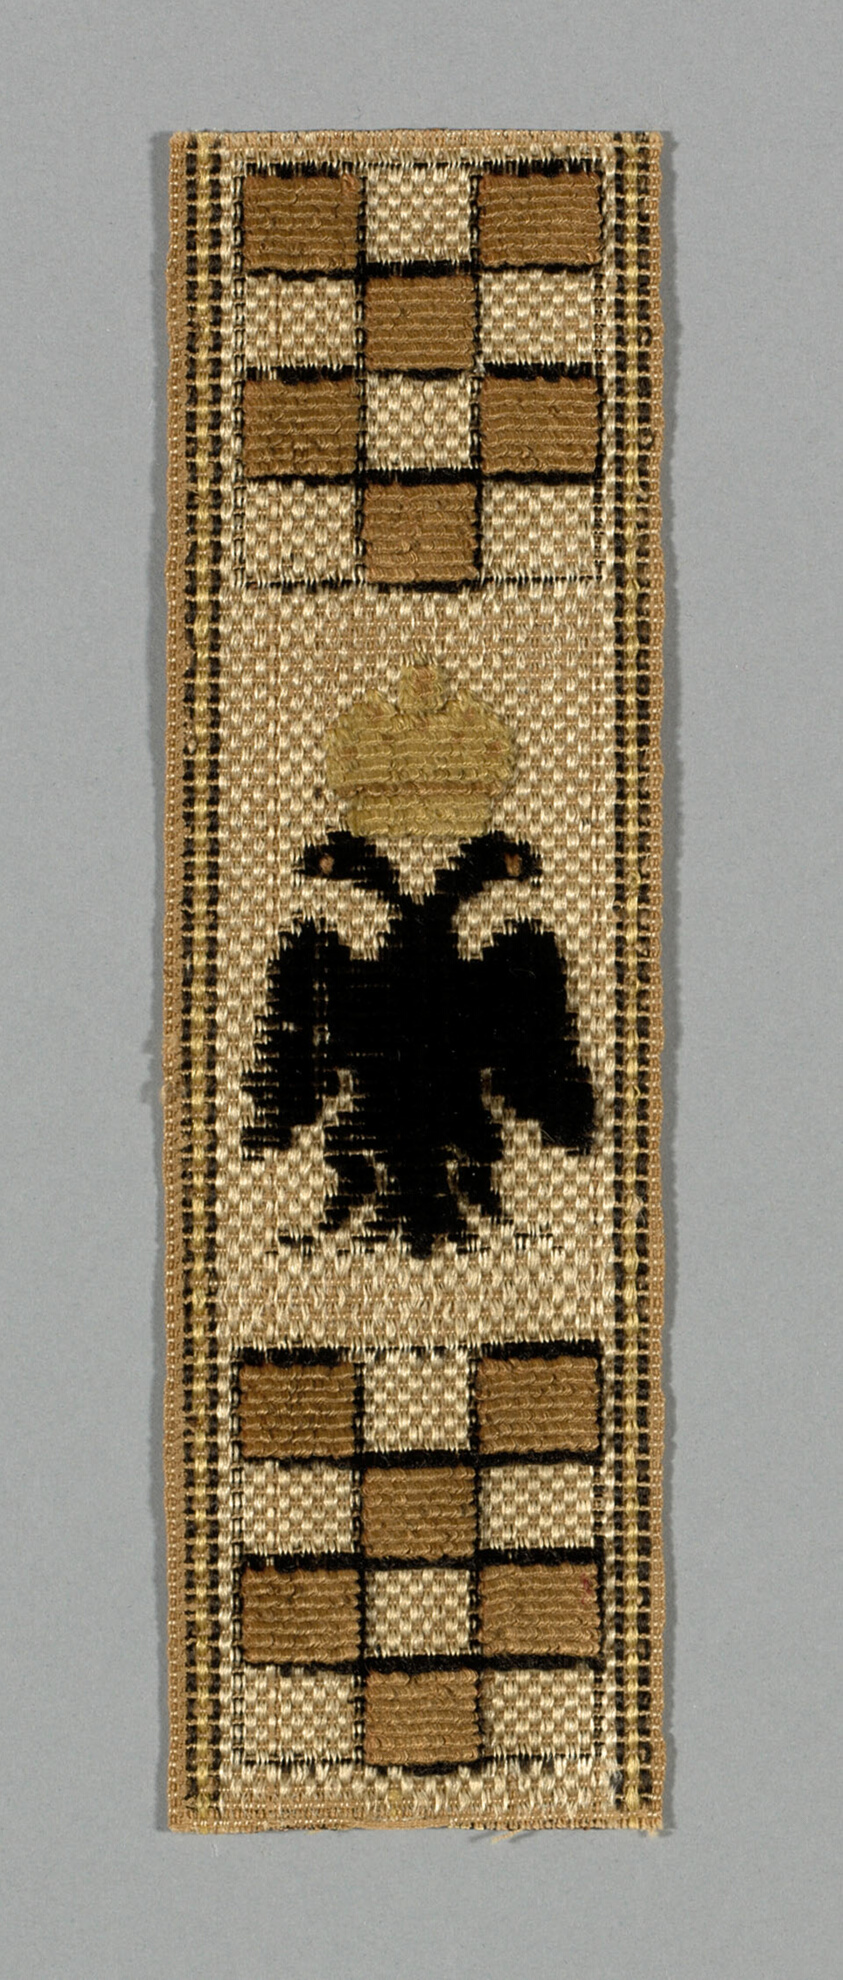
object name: Textile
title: Uncut Yardage (Panel for Dress)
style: qing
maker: China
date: 18th century, Qing dynasty (1644–1911)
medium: Silk, plain weave; painted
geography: China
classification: textile; weaving